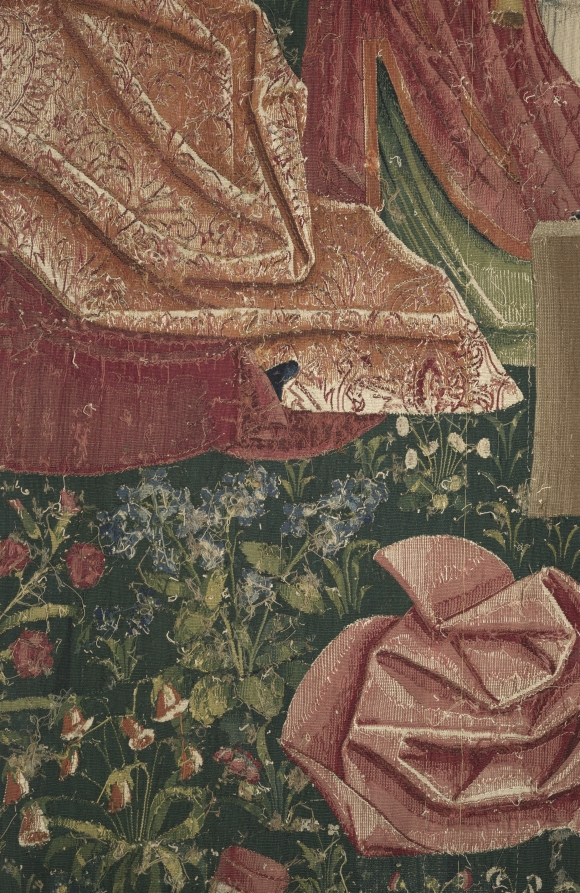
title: The Triumph of Eternity (from Chateau de Chaumont set)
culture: France, Lyon(?), early 16th century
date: 1512–15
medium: silk and wool; tapestry weave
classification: Tapestry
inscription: French verse in Gothic letters translates as follows: "Nothing triumphs by right authority, Unless it be conducted by Eternity. Nothing is permanent beneath the firmament, But above us triumphs Eternity."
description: The Triumph of Eternity is represented by the Coronation of the Virgin. Dressed in crimson velvet with an opulent brocaded velvet shawl, the Virgin is seated in the center as two angels hold a crown over her head. Five musical angels surround her playing an organ, recorder, straight cornetto, harp, and lute, while another sings from an open music book. The scenes in the set display a conservative style in which the figures are placed in shallow landscapes, thereby ignoring pictorial innovations for depicting space and mass. The verse in Old French at the top states: Nothing triumphing by due authority Remains permanent and durable. Nothing is permanent under the heavens, But above, eternity triumphs.